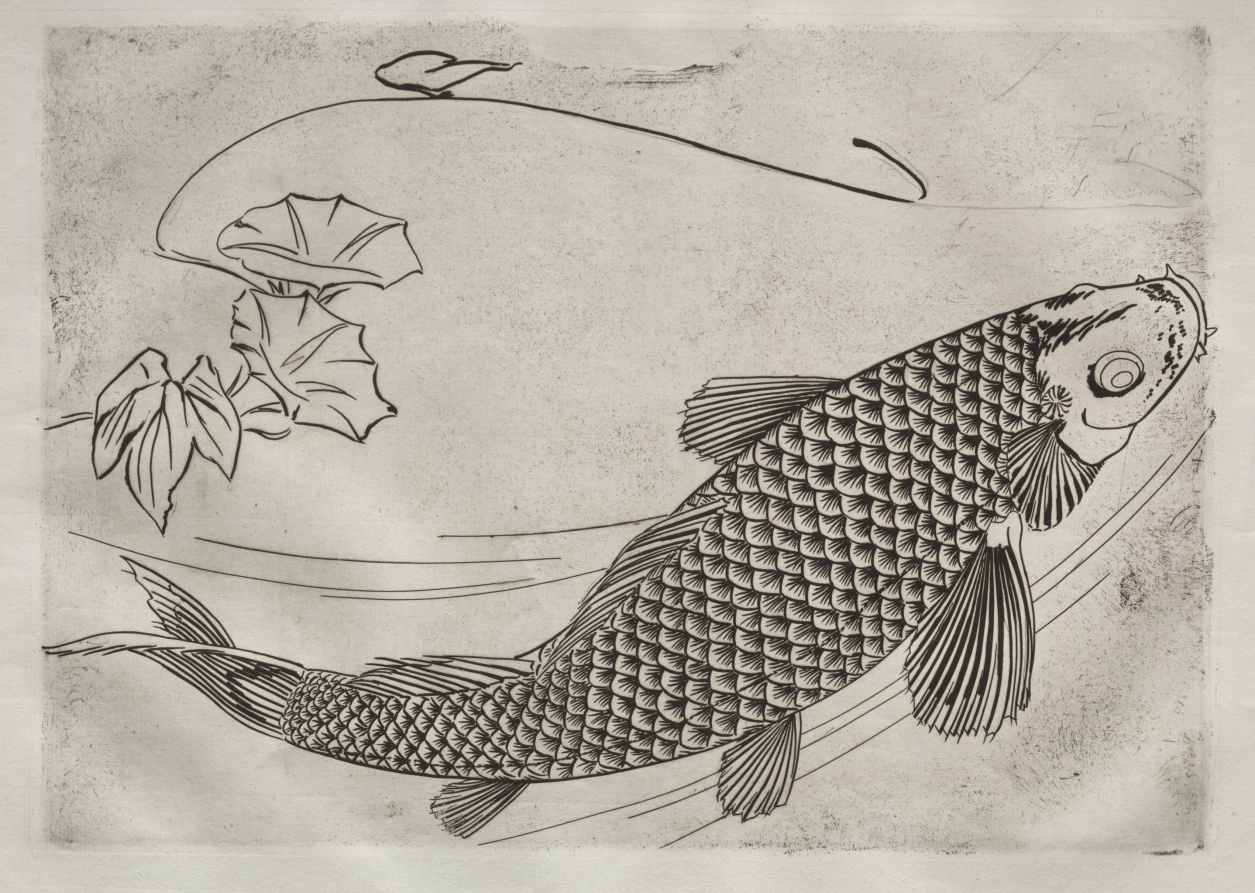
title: Dinner Service (Rousseau service): Large fish in a Japanese style (no. 19)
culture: France, 19th century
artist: Félix Bracquemond (French, 1833–1914)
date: 1866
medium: etching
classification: Print